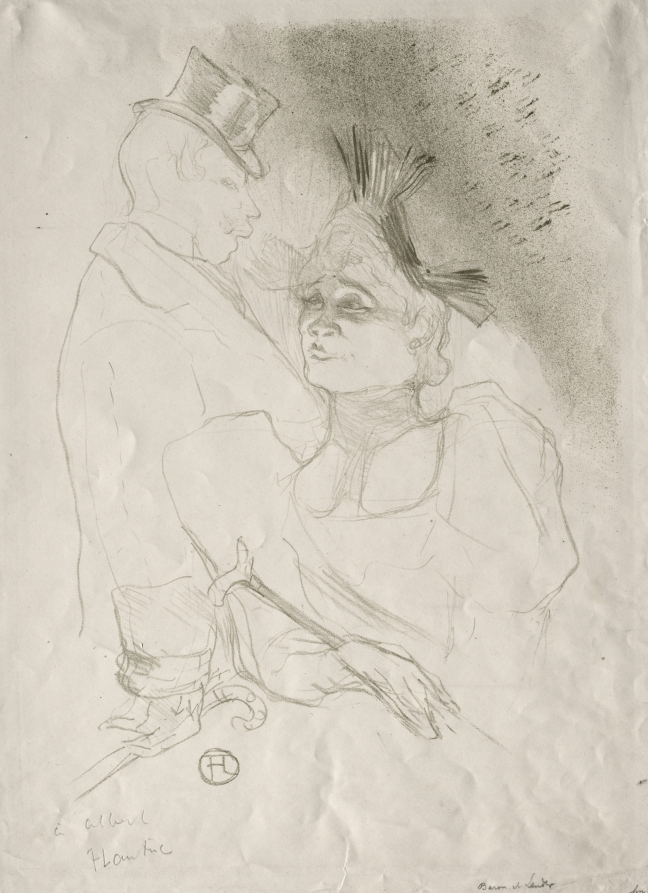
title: Lender and Baron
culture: France, 19th century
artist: Henri de Toulouse-Lautrec (French, 1864–1901)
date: 1893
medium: lithograph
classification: Print